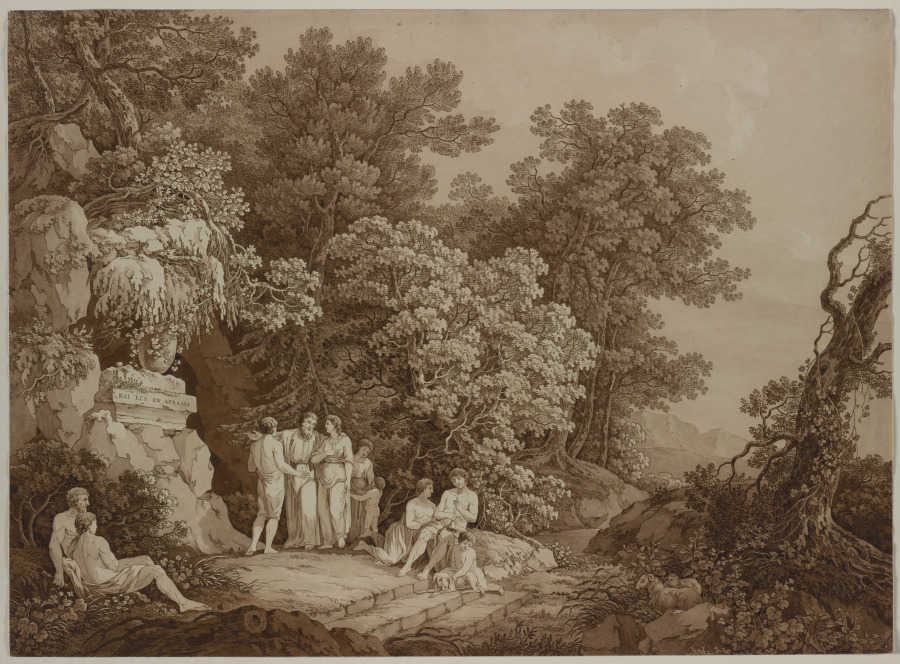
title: I was also in Arcadia (Kai ego en Arkadia)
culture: Switzerland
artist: circle of Adrian Zingg (Swiss, 1734–1816)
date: 1789–1790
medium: etching hand-colored with wash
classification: Print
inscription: verso, pen and brown ink: Auch ich war in Arcadian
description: A Swiss etcher and draftsman primarily active in Germany, Adrian Zingg was esteemed as one of the most important landscapists of his generation. This Arcadian view—a technical marvel combining line etching with delicate washes of brown—is a superb example of the German Romantic landscape in which contemplative, idealized figures meditate and converse in a meticulously rendered wooded grove. It is thought that Zingg executed the etching and members of his workshop completed the hand coloring, following one of Zingg’s drawings.